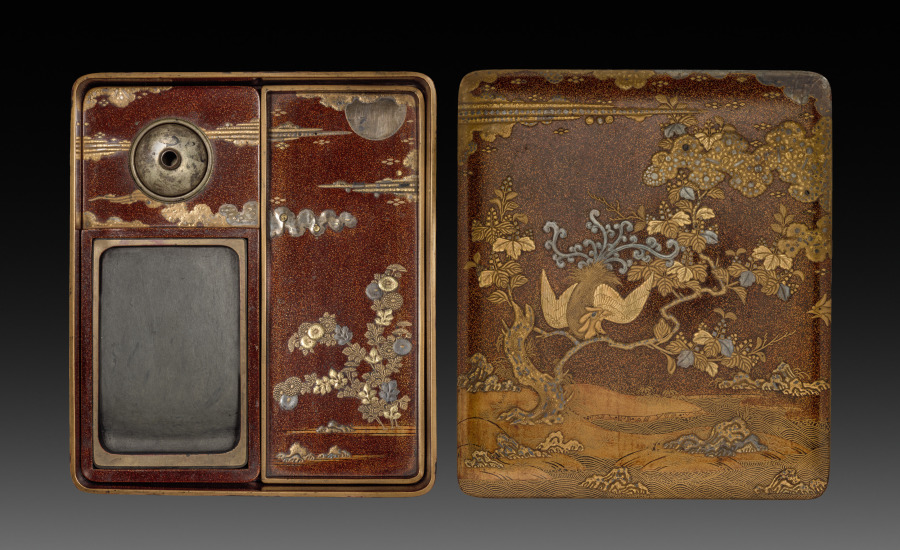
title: Writing Box (Suzuribako) with Phoenix in Paulownia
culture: Japan, Momoyama period (1573–1615)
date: late 1500s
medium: Lacquer on wood with sprinkled gold and silver powder (maki-e) and gold and silver foil application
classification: Lacquer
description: The only place the mythical phoenix will perch is in the paulownia tree. Along with the dragon, the bird is a symbol of imperial power in East Asia. This box––a container for an inkstone, brushes, and ink––is both functional and lavish, its dramatic effects achieved with a pear-skin ground decoration (nashiji) and sprinkled powder decoration in high relief (takamaki-e).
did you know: In contrast to the bright, celebratory motifs on the exterior, the interior of the box invites a more reflective mood with its autumn moonlit sky over chrysanthemums.